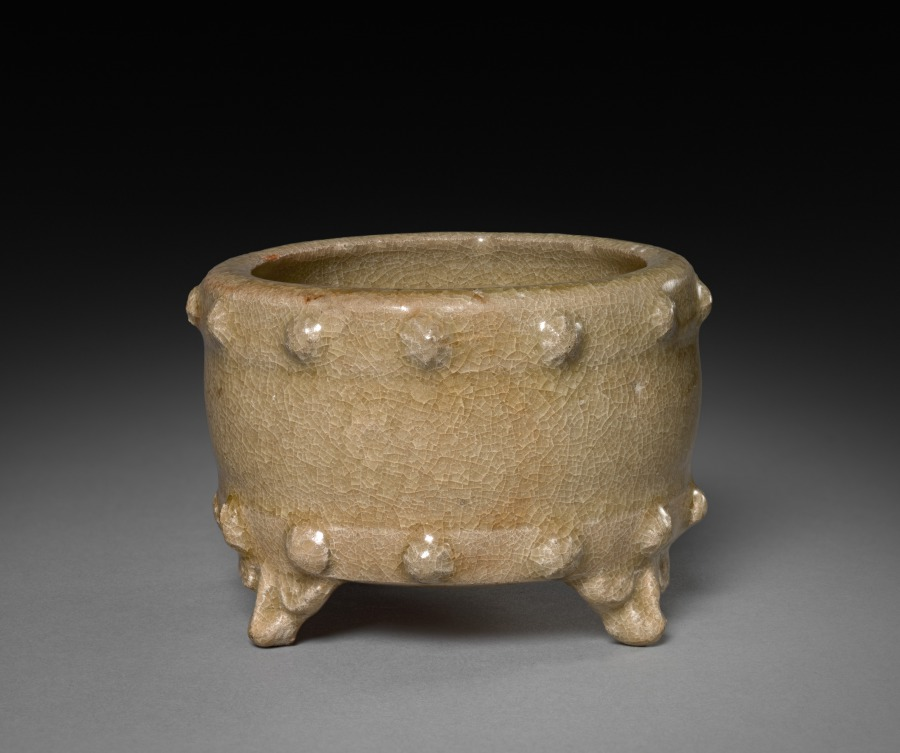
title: Incense Burner: Southern Celadon Ware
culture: China, Yuan dynasty (1271-1368)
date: 1271–1368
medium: glazed buff stoneware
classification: Ceramic